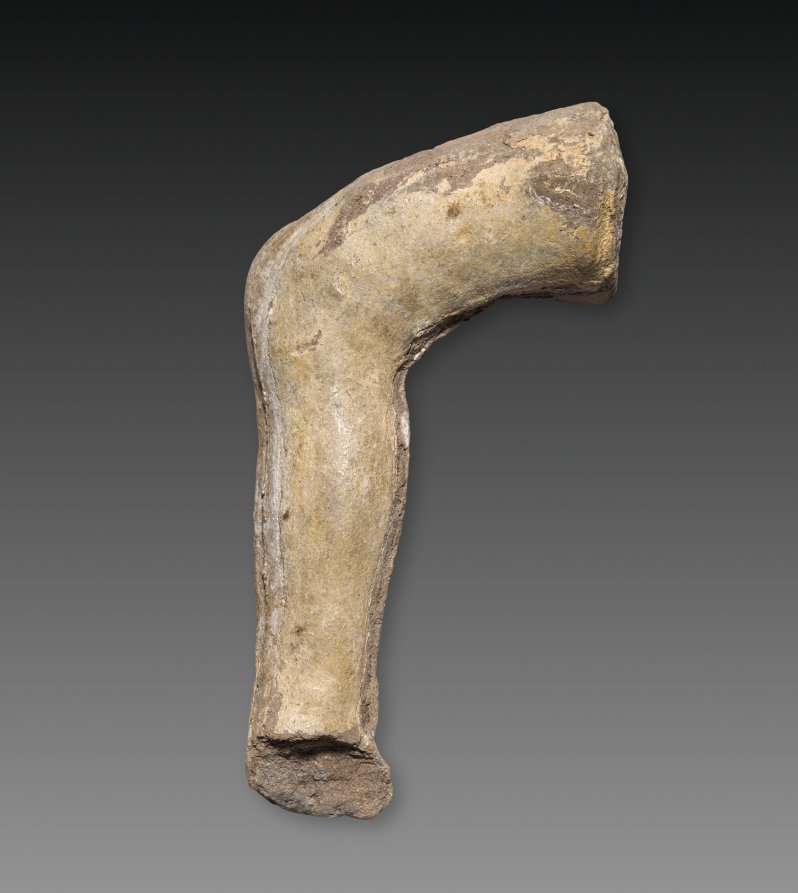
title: Fragment of a Leg (right leg)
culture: France, late 19th-early 20th Century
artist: Auguste Rodin (French, 1840–1917)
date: c. 1880 – 1917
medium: plaster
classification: Sculpture